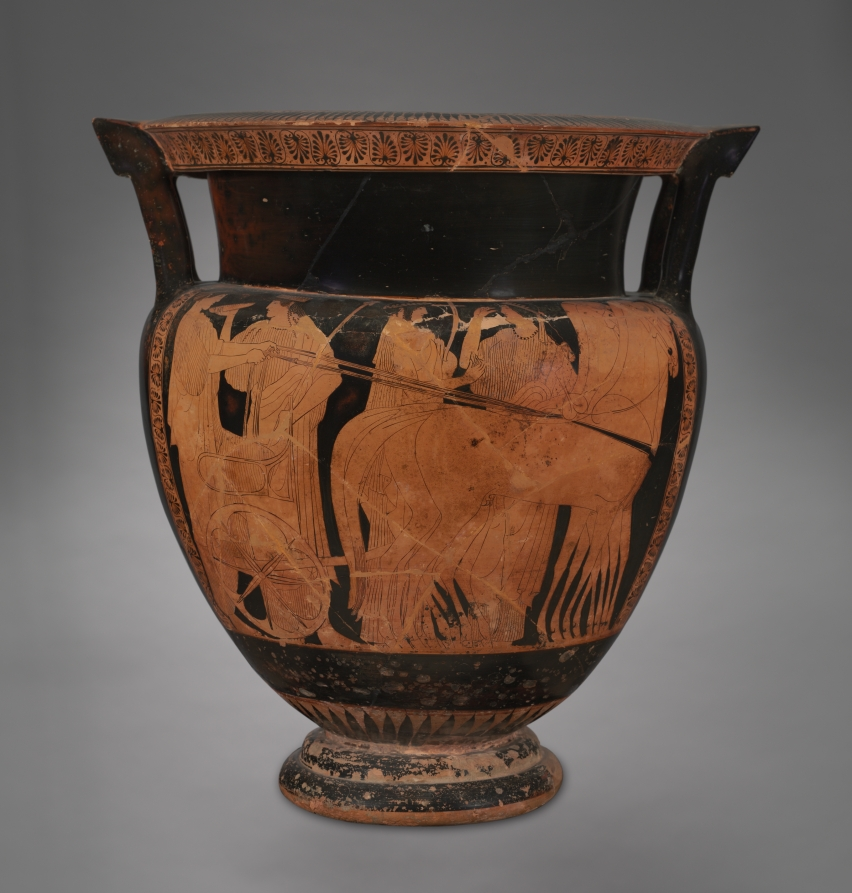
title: Red-Figure Column Krater (Mixing Vessel): Apollo and Goddesses with Chariot (A); Komos (Revel) (B)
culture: Greek, Attic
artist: attributed to Cleveland Painter (name vase; Greek, Attic, active c. 470–460 BCE)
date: c. 470–460 BCE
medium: ceramic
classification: Ceramic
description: Since this column-krater is the most important of 12 vases painted by a Greek artist whose name is unknown, the great English vase expert, Sir John D. Beazley, named him (or her) the Cleveland Painter, after our city. Other vases by the Cleveland Painter are now in New York, Vienna, Paris, and Copenhagen, as well as museums in Greece and Italy. The chariot scene on the main side of the vessel is a divine one, as indicated by the presence of Apollo, identified by his lyre and laurel wreath. With him are three goddesses, probably his sister Artemis (facing him), together with Hera (wearing a crown and holding a scepter and libation dish), and Hebe, the daughter of Zeus and Hera, on her way to meet her future husband, Herakles.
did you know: The revelers on this vessel dance to the music of the barbiton, a stringed instrument associated with leisure and luxury.